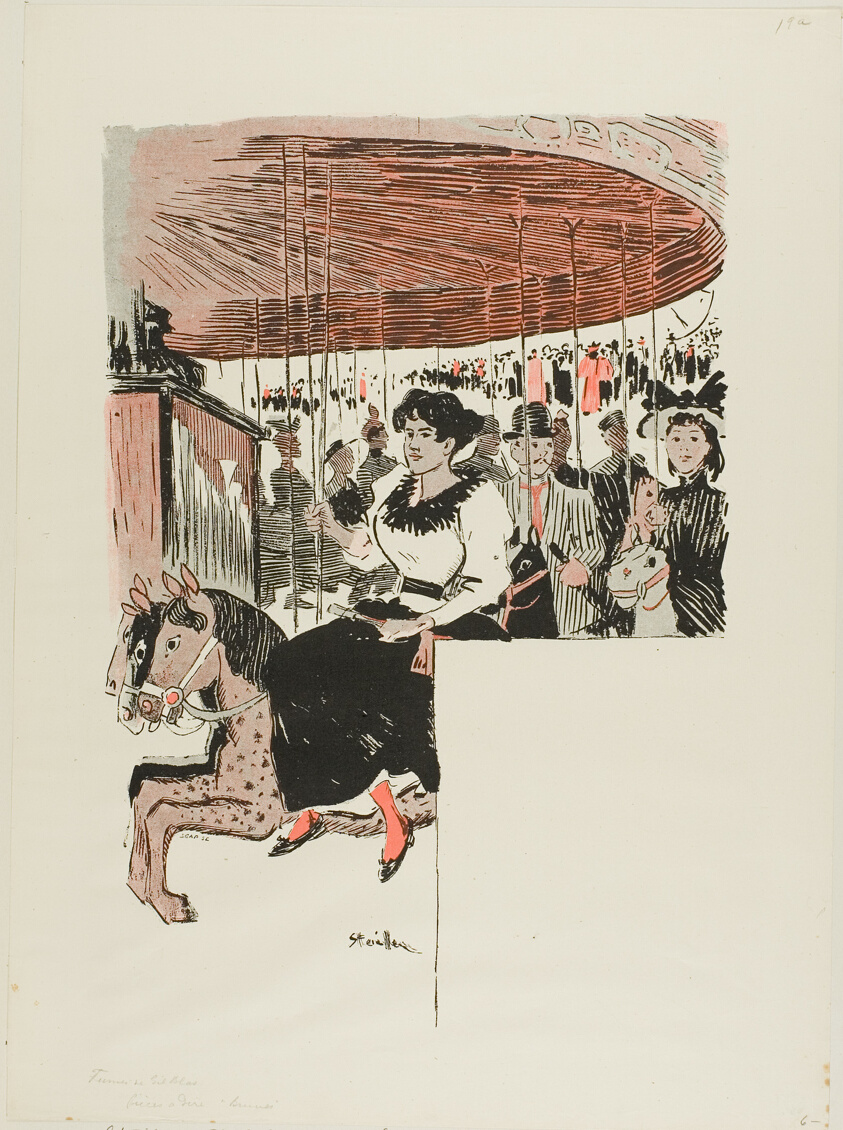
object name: Print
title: Brune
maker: Théophile-Alexandre Steinlen; French, born Switzerland, 1859-1923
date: published September 1, 1893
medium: Photorelief print in red and black on ivory wove paper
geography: France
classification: photorelief; print; prints and drawing